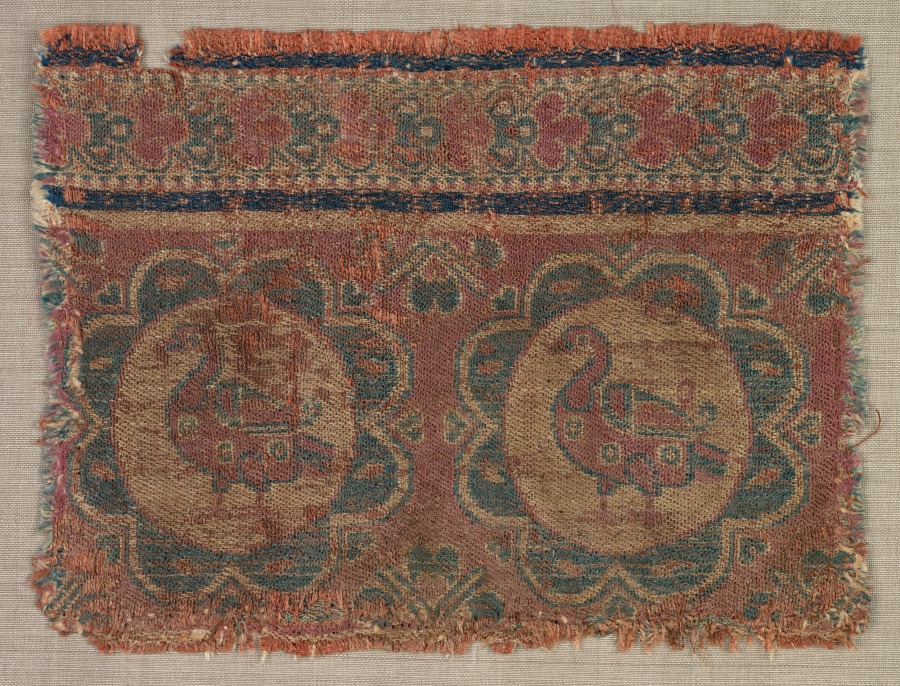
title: Silk fragment with roundels of ducks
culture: Iran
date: 600s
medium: samite: silk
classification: Textile